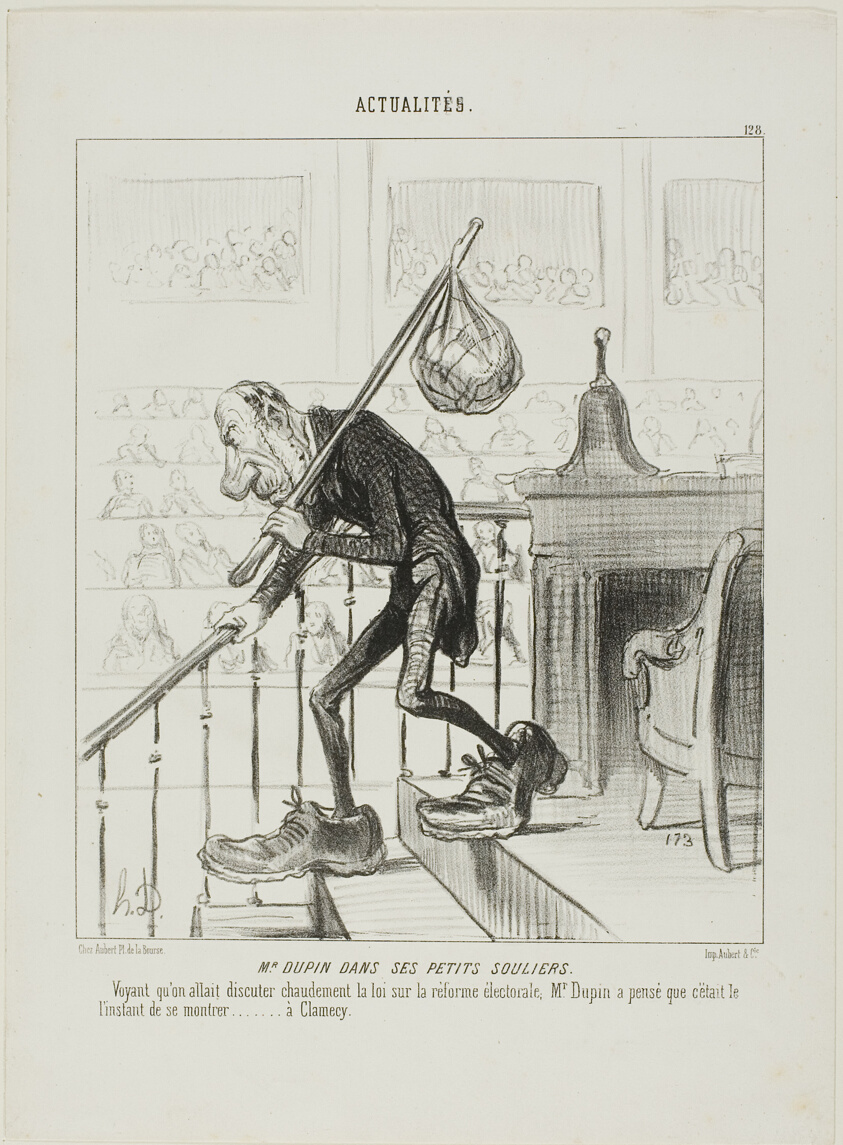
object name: Print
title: Mr. Dupin in His Little Shoes. Once Mr. Dupin noticed that one started a heated discussion about the reform of the election laws, he considered it the right moment to show himself at Clamecy, plate 123 from Actualités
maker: Honoré Victorin Daumier; French, 1808-1879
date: 1850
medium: Lithograph in black on white wove paper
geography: France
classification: lithograph; print; prints and drawing